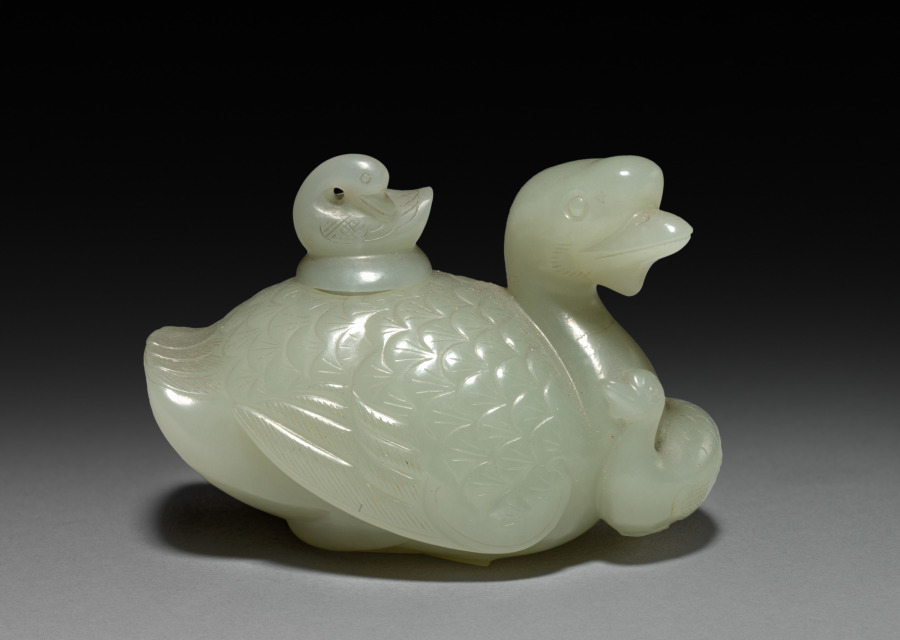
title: Goose and Goslings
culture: China, Qing dynasty (1644-1911)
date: 1700s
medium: jade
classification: Jade